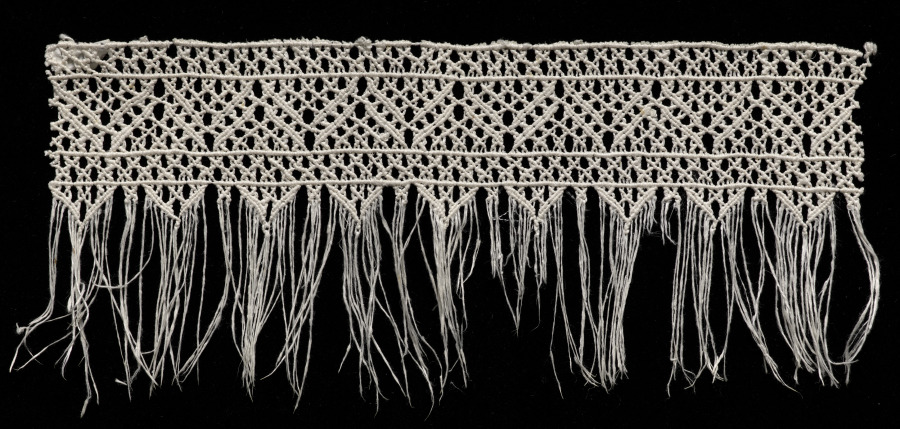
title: Lace Edging and Fringe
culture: Italy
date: 1500s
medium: Linen: knotted lace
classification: Lace